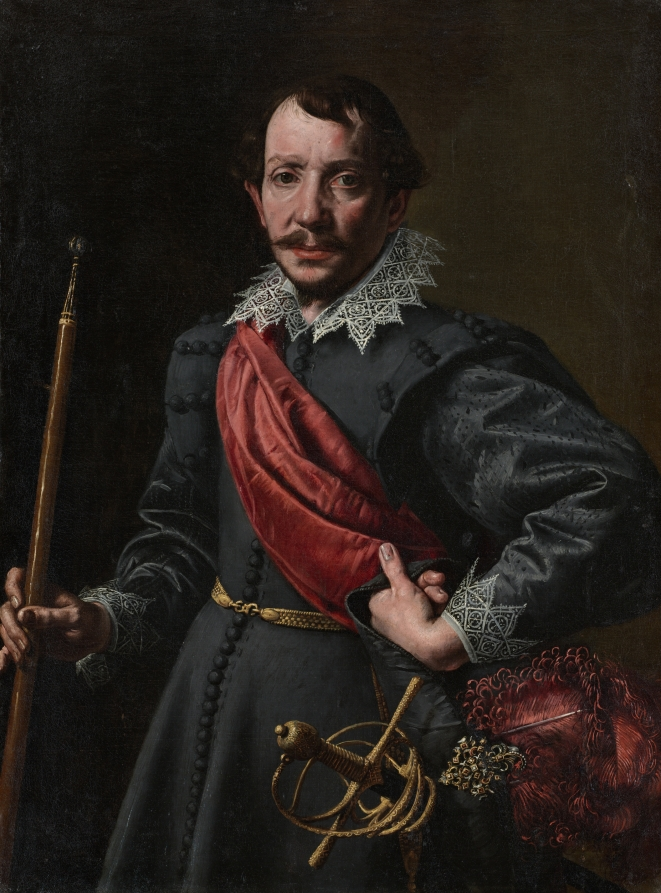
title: Portrait of a Man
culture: Italy, 17th century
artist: Tanzio da Varallo (Italian, c. 1575/80–1635)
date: c. 1620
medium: oil on canvas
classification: Painting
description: This portrait of an unknown man includes a detailed representation of a rapier, a sword worn with civilian dress and used in duels. On the basis of style, the rapier in this painting belonged to a distinctive group of sword hilts decorated between about 1570 and 1600. It was probably made in northern Italy.The son of a Piedmontese architect, Tanzio spent most of his life in northern Italy, but worked briefly in Rome and southern Italy, mainly Naples. These trips brought him under the influence of Caravaggio, whose dramatic realism Tanzio integrated into his own elegant, decorative style.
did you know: Dashing accessories enliven this portrait, including a rapier with an elegantly spiraling guard, produced exclusively in North Italy between 1570 and 1600.